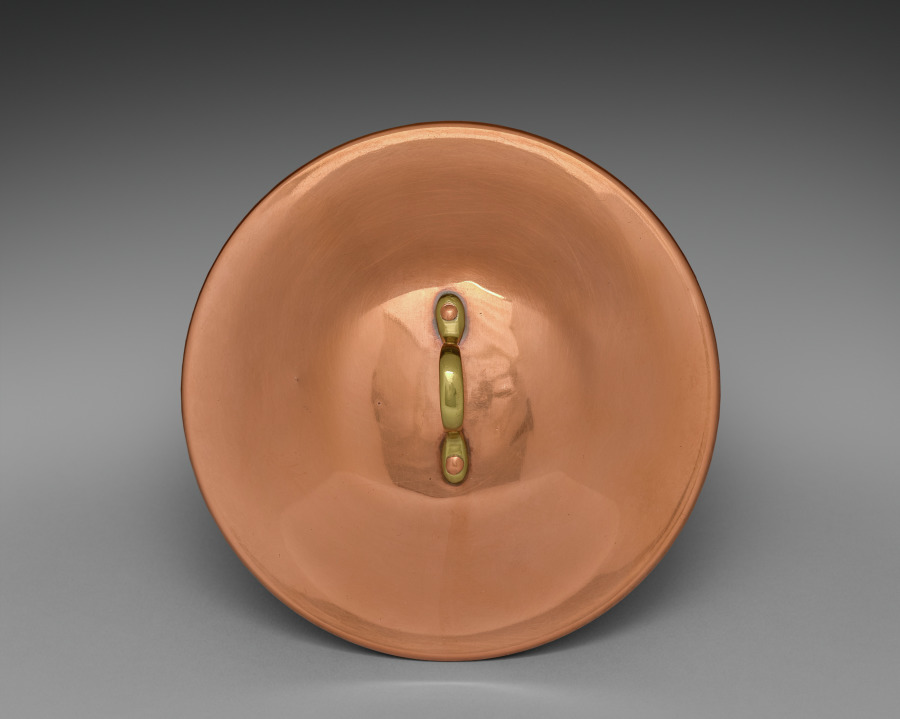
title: Cover for a Pot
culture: Russia, St. Petersburg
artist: firm of Peter Carl Fabergé (Russian, 1846–1920)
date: 1914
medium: copper with brass handles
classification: Metalwork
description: As Russia entered the First World War, austerity and economy settled into the fabric of life even among wealthy aristocrats and nobility. Not only were precious materials such as gold, silver, and gemstones hard to procure, but such luxury seemed out of place when so many men were dying at the front. Fabergé contributed to the war effort by making shells, casings, and other munitions out of brass and copper. He also made cookware, such as this small covered soup pot, to be sent to the front lines with provisions tucked inside. However, these simple forms only looked affordable. They were still a luxury only the wealthiest families could afford to send to their sons.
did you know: This lid is the cover for a copper soup pot that was sent to the front lines filled with provisions during the First World War.